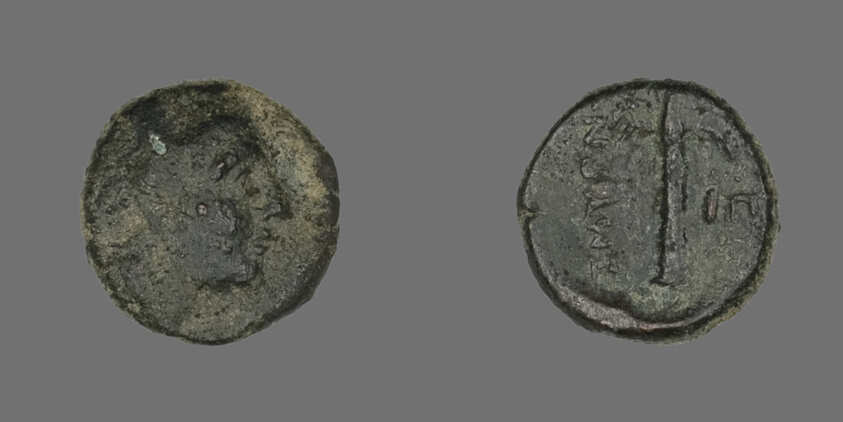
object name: Coin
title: Coin Depicting the God Apollo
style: greek, ancient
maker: Greek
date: 2nd-1st century BCE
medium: Bronze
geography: Ancient Greece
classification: coin; ancient art